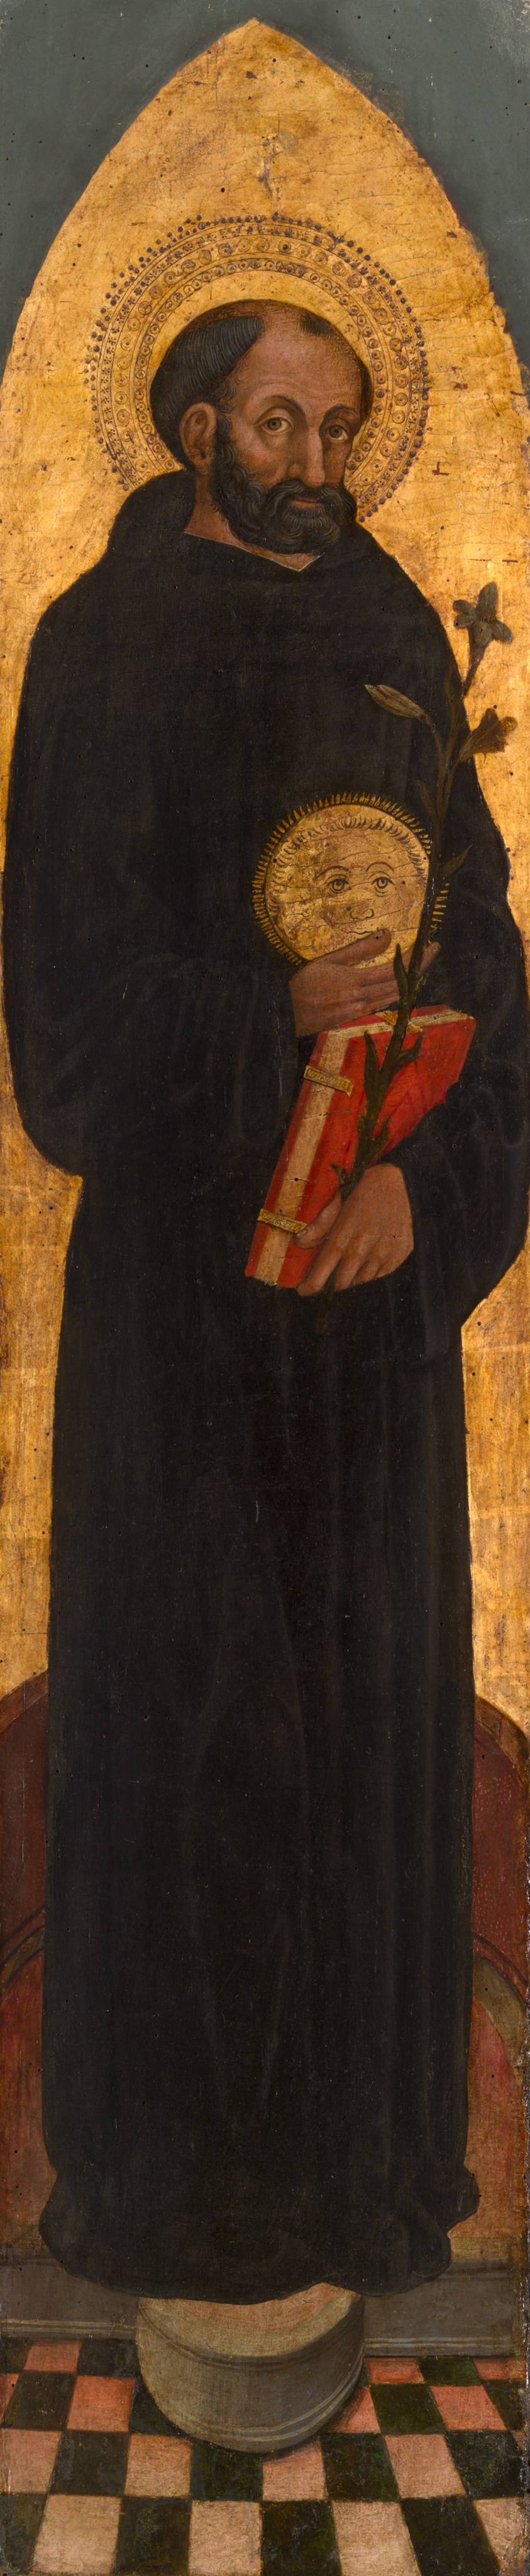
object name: Painting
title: Saint Nicholas of Tolentino from an Augustinian altarpiece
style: 15th century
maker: Italian; Venice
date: 1450/75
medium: Tempera and oil on panel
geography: Venice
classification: altarpiece; tempera; altar; Italian; oil on panel; oil paintings (visual works); painting; european painting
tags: saints, altar, Christian subjects, Christianity, religion, religious, religious attire, religious figures, religious scenes, gold (color), book, bibles, flowers, man